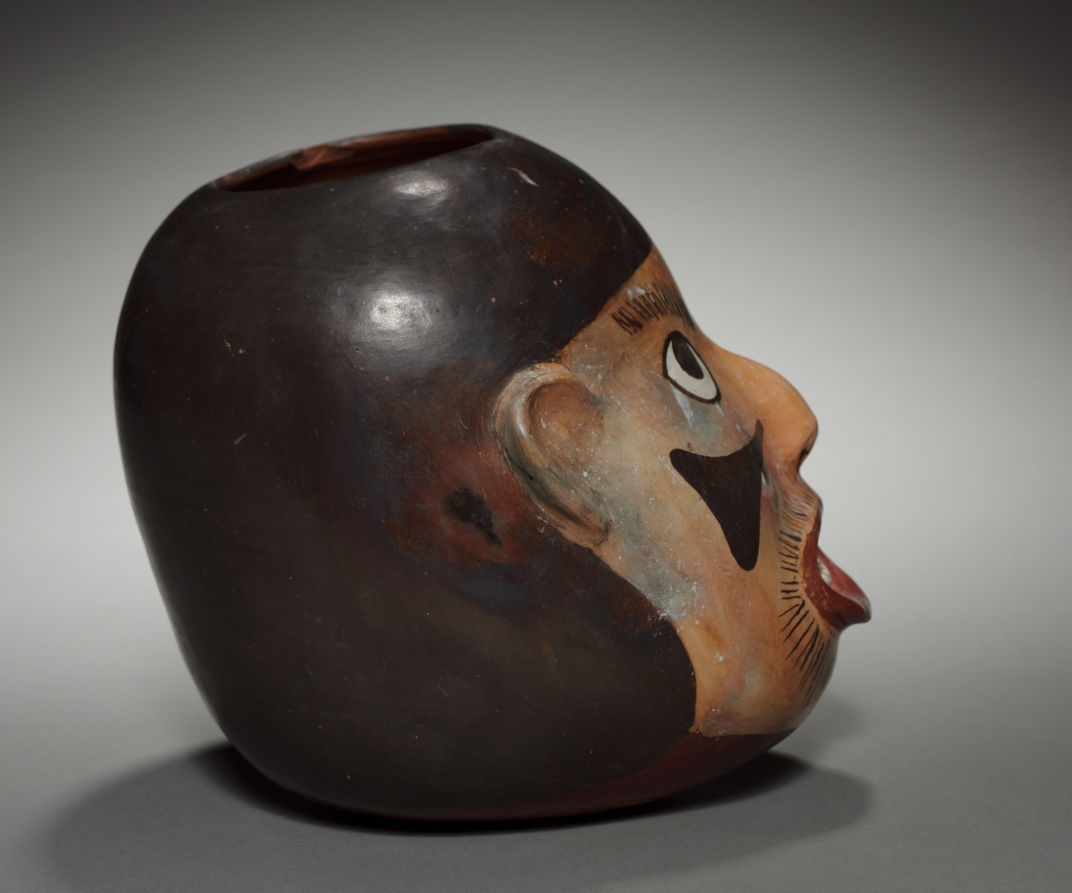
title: Severed Head Effigy Vessel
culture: Peru, South Coast, Nasca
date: c. 100–350 CE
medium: earthenware with colored slips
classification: Ceramic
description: The Nasca people were organized politically into small, competing chiefdoms, and warfare was common. This vessel represents a freshly severed human head (probably that of a captured and sacrificed prisoner) with staring eyes, gaping mouth, and blood-red underside. Modeling of the mouth cavity, tongue, and teeth lends the image a startling realism. Human sacrifice by decapitation was a central element of Nasca religion, essential to agricultural fertility. Severed heads were emptied and dried, then pierced through the forehead and suspended from a thick cord. Such preserved heads have been recovered from offering deposits and from tombs, where they were buried with their captors.